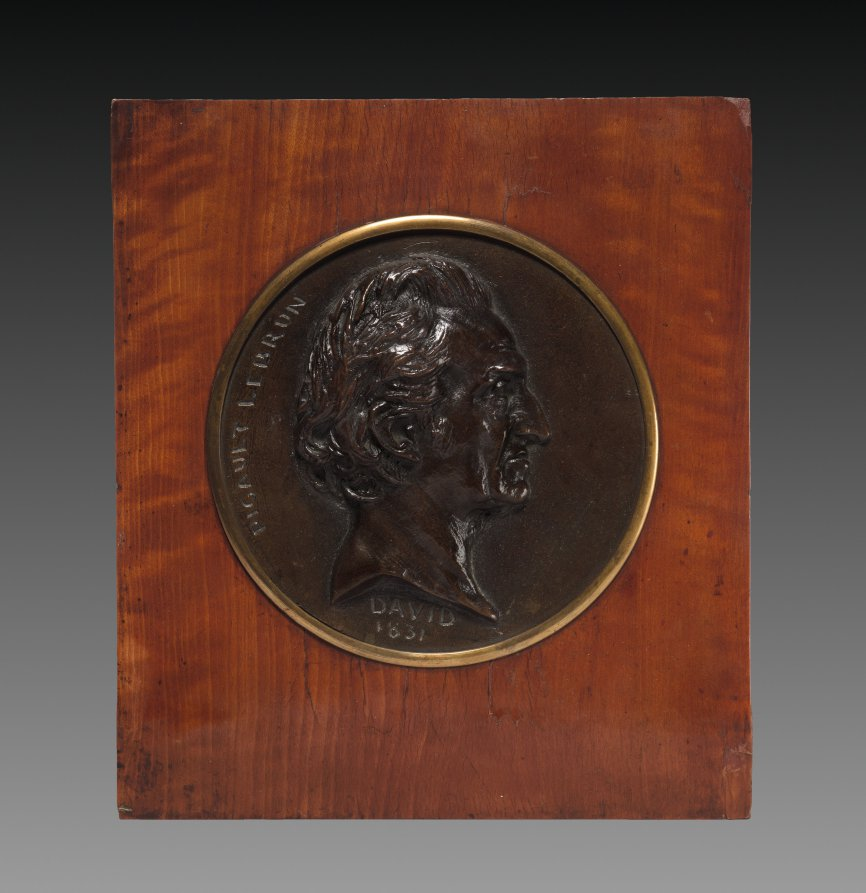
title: Portrait Medallion of Pigault-Lebrun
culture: France, 19th century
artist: Pierre Jean David d'Angers (French, 1788–1856)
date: 1831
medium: bronze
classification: Sculpture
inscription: inscribed beneath cut of neck: "David/ 1831"; inscribed at left: "Pigault Lebrun."